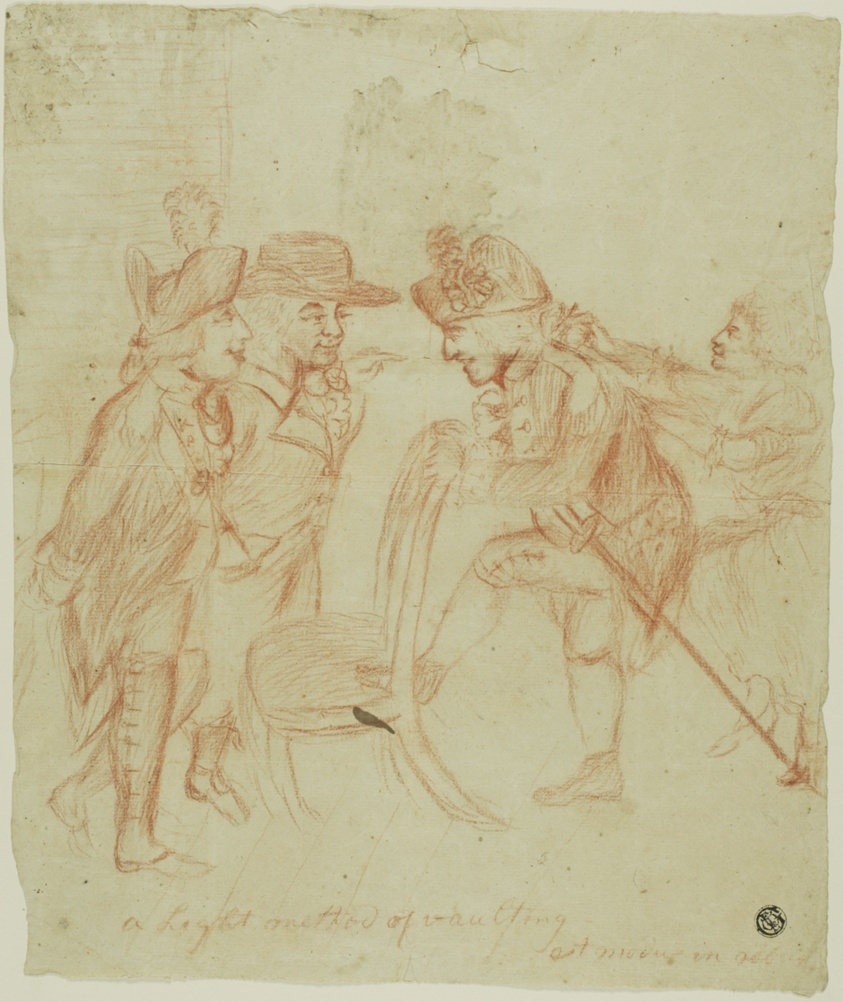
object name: Drawing and Watercolor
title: A Light Method of Vaulting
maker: Attributed to Henry William Bunbury (English, 1750-1811); or James Gillray (English, 1756-1815); or William Hogarth (English, 1697-1764)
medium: Red chalk on cream laid paper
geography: England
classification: chalk; drawings (visual works); prints and drawing